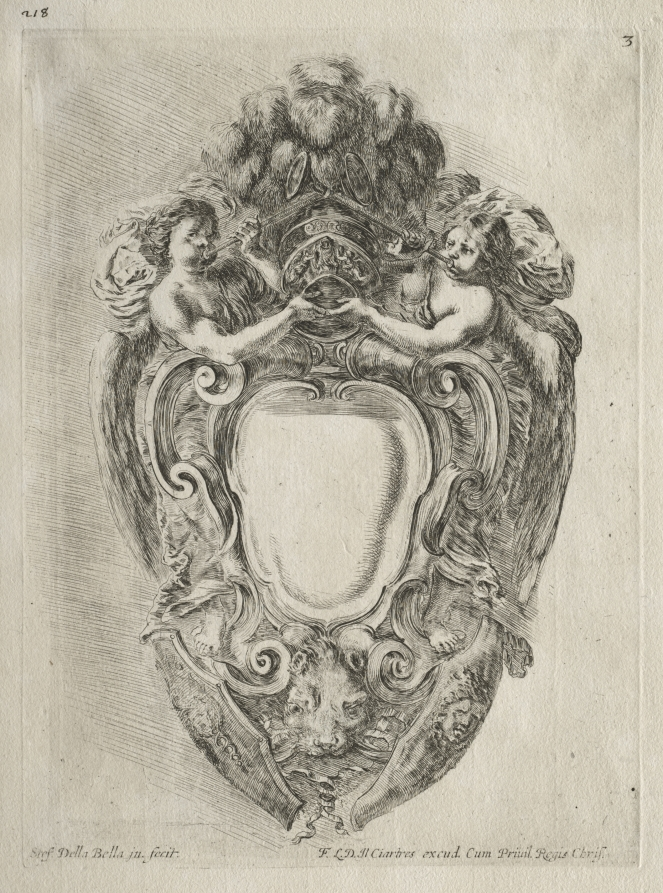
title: Collection of Various Caprices and New Designs of Cartouches and Ornaments: No. 3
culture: Italy, 17th century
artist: Stefano Della Bella (Italian, 1610–1664)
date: 1646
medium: etching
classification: Print